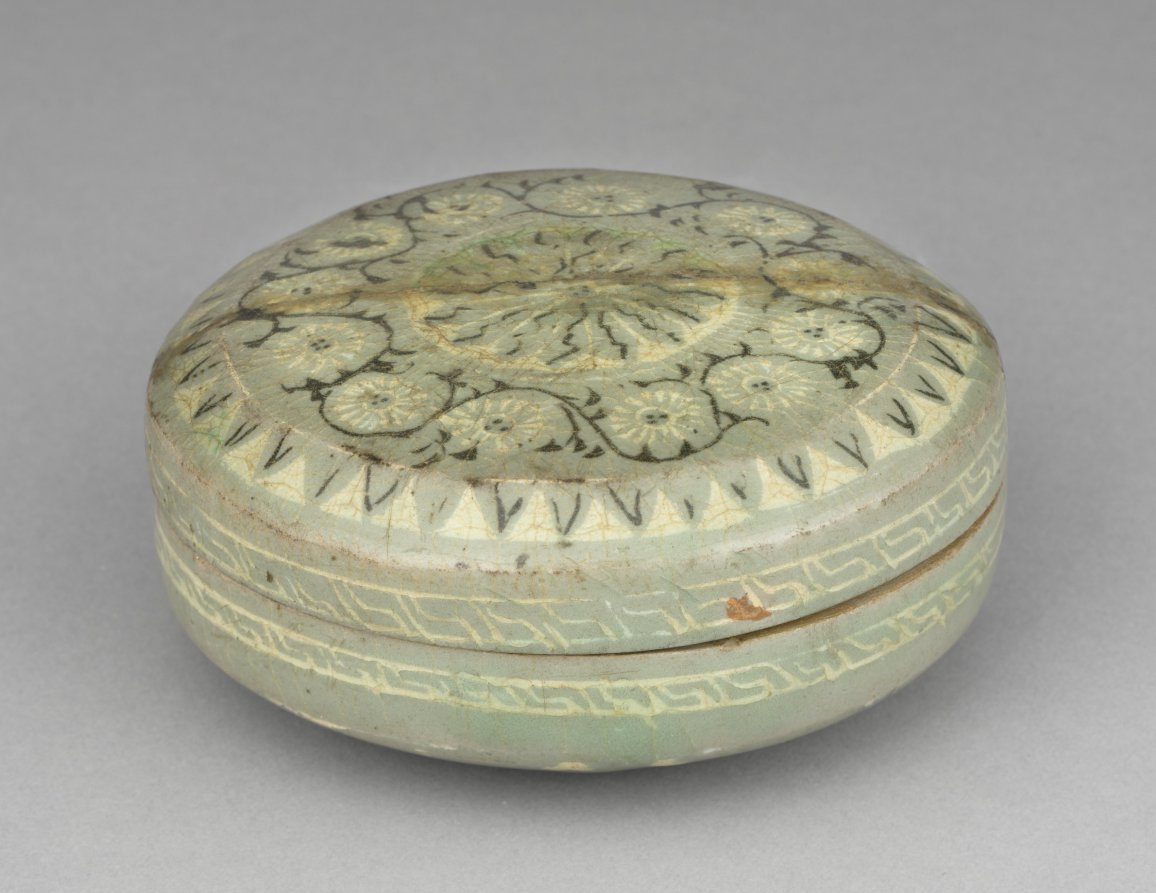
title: Box and Cover with Inlaid Chrysanthemum and Scroll Design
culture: Korea, Goryeo dynasty (918–1392)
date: 1200s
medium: pottery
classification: Ceramic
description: Celadons, spoons, seals, and bronze mirrors were the most common burial objects in tombs during the Goryeo period (918–1392). Once used to contain colored powder, rouge, and eyebrow gel for makeup, this small container was one of the standard goods that furnished tombs of the elites. Both women and men used the grain powder of rice or millet for whitening their skin, safflower extract for rouge, and plant ash or soot for eyebrow gel. Yet, natural-looking makeup seems to have been the most favorable one in Korea according to the travelogue by Xu Jing (1091–1153), the Chinese diplomat who visited Korea in 1123.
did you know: This ceramic container was used to store either incense or cosmetics.